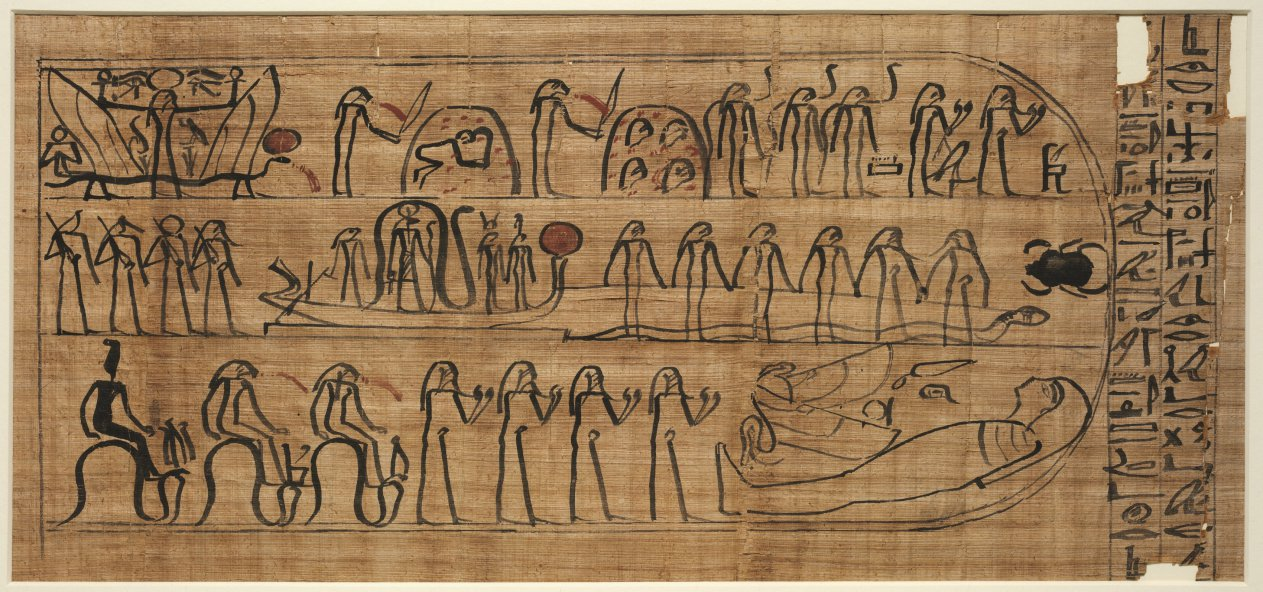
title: Book of Amduat of Buiruharmut, with Elements of the Tenth through Twelfth Hours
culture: Egypt, Third Intermediate (1069–715 BCE), Dynasties 21–22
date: 1000–900 BCE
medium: papyrus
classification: Funerary Equipment